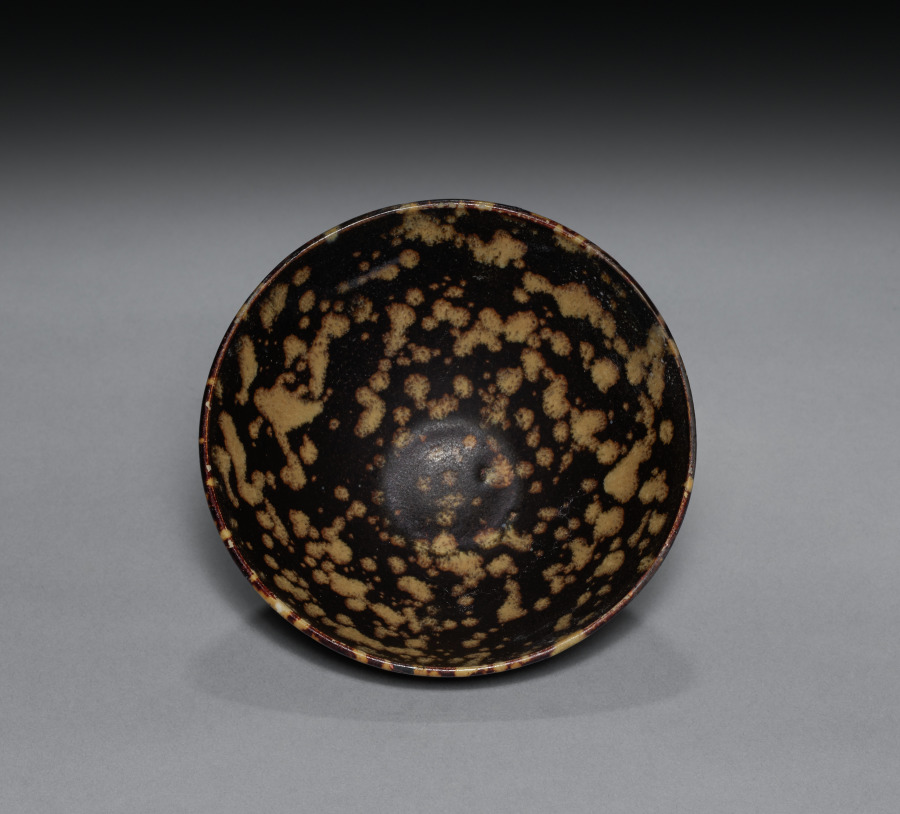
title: Teabowl with Tortoiseshell Glaze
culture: China, Jiangxi Province, Southern Song dynasty (1127–1279)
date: 1100s–1200s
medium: Brown-glazed stoneware with "tortoiseshell" pattern, Jizhou ware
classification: Ceramic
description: This teacup with a so-called tortoiseshell glaze is a fine example of southern ware from Jizhou, where potters specialized in brown splashed glazes sometimes resembling partridge feathers or tortoise shells. The variety of dark glazes and vessel types produced by the Jizhou kilns are evidence of the popularity of black ware at the time. Jizhou kiln potters competed with the Jian kilns which produced almost exclusively teacups, such as the Black-Glazed Teabowl (CMA 2020.176) and the Black-Glazed Teabowl with Incised Characters (CMA 2020.175).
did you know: The Jizhou kiln site is designated as one of fifty-one Major National Historical and Cultural Sites in Jiangxi province.